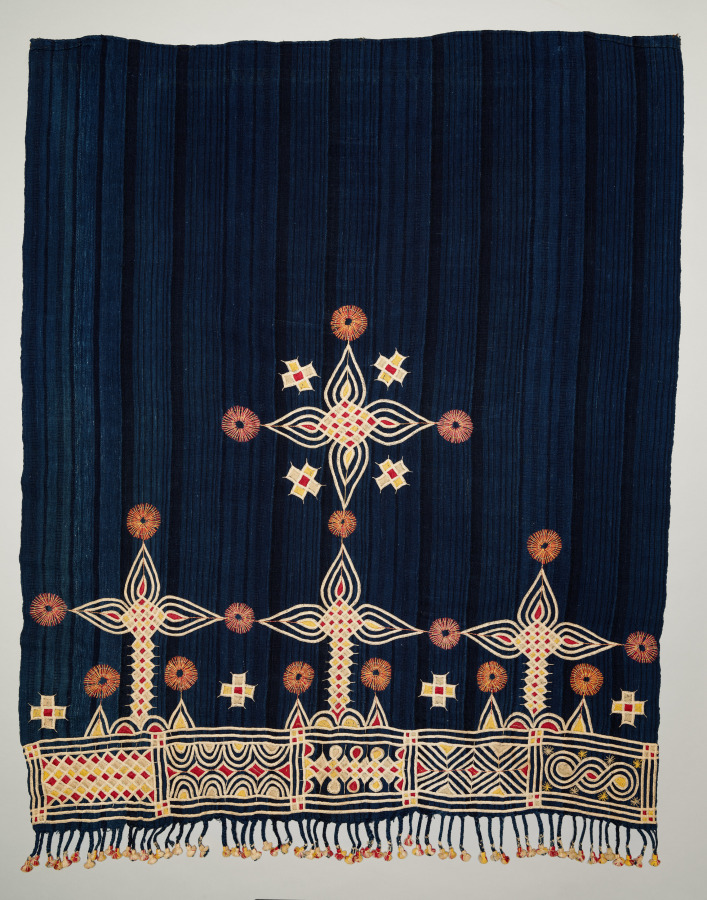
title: Woman's Shawl or Head Covering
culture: Africa, West Africa, Côte d’Ivoire, Hausa or Dyula-style, unknown makers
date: 1900–1925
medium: Cotton, silk, indigo and other natural dyes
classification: Textile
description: A woman would have worn this embroidered textile on her head or her shoulders, with the motifs on her back. It was likely adorned by itinerant Hausa embroiderers, whose knowledge as Koranic scholars inflected their work with a symbolic and calligraphic style. The large, almond-shaped forms may represent lotus leaves or may have links to Islamic talismanic motifs or amulets (hatumere).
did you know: Only six examples of this rare textile are known.